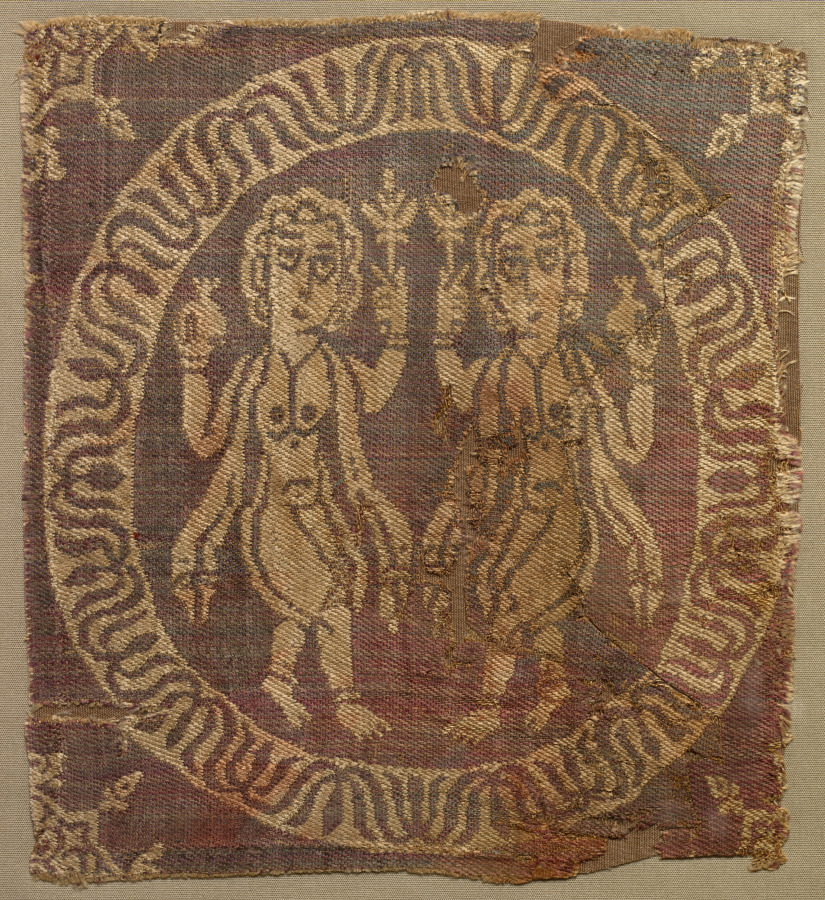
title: Nude Female Dancers from a Tunic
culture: Egypt or Syria, Umayyad period (661–750) or Abbasid period (750–1258)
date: 700s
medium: Silk; complementary weft-faced twill weave with inner warps (samite)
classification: Textile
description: Voluptuous females in sheer attire were not only depicted in contemporary wall paintings but also woven in lengths of silk fabric that were cut into squares to decorate linen tunics. These symmetrical female dancers, with anklets and long scarves draped around their shoulders, hold branches and pomegranates.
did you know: Four or six squares of this luxurious two-color silk were originally sewn on a linen tunic, two positioned above the hemline in the front and two in the back, and possibly two more at the shoulder. The folded edges are still visible, including a silk sewing thread on the right side. The brittle condition is evident in the numerous crisp breaks.